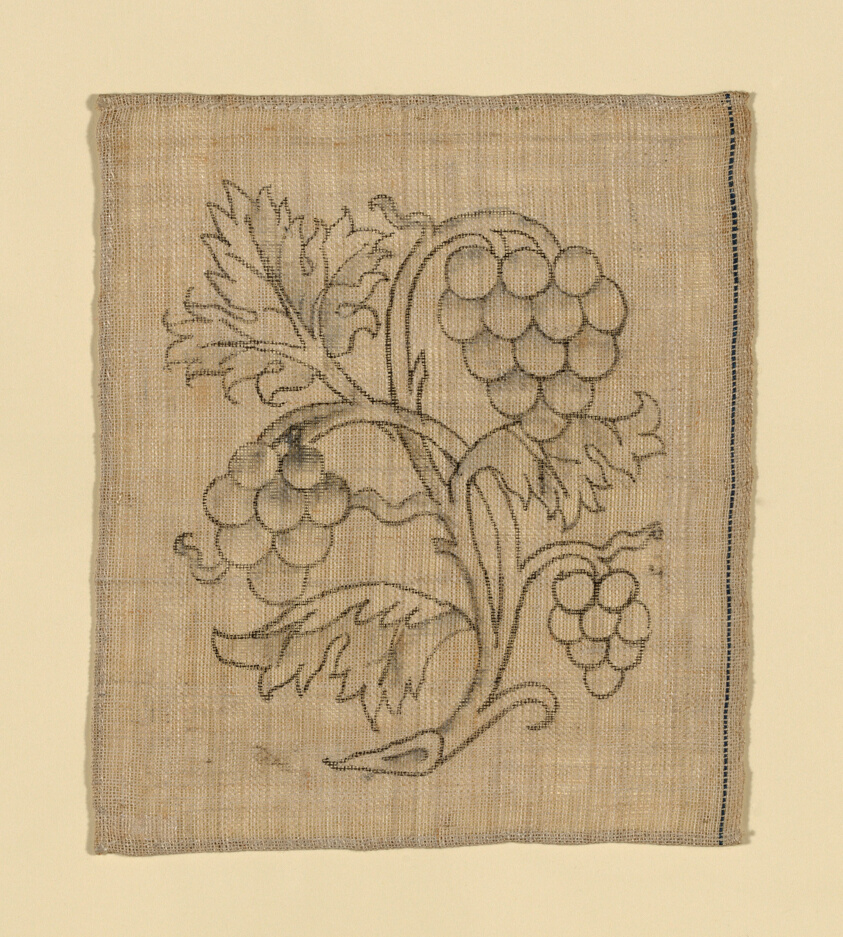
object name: Textile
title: Slip (Unfinished)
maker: England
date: 1590/1640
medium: Linen, plain weave with drawing in pencil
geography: England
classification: textile; patterns (guides); needlework (visual works); accessories (object genre)